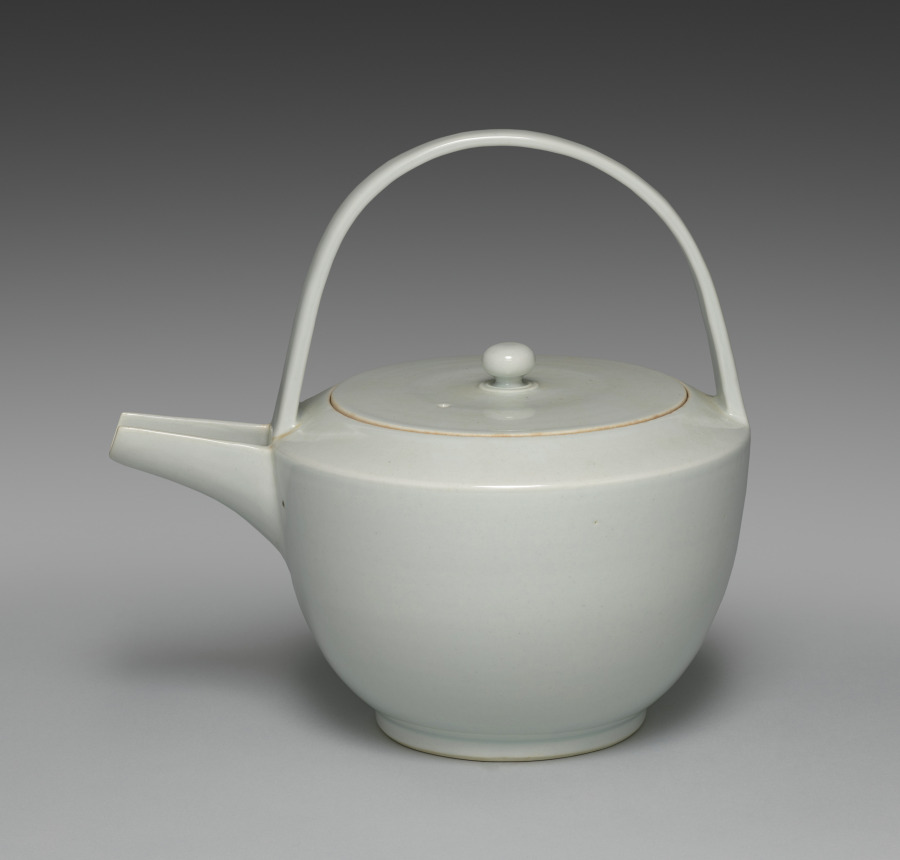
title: Sake Pourer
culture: Japan, Meiji period (1868–1912)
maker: Seifū Yohei III (Japanese, 1851–1914)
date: c. 1887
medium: Porcelain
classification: Ceramic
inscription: Artist's signature in underglaze blue on the base.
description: This sake pourer has a wide basin with a low foot; a generous spout open across the top half; a flat, round lid with a small knob recessed flush to the top of the container; and a tall, arched handle that meets the container where the top joins the basin at a sharp angle. This vessel is glazed but otherwise undecorated. Unlike the creamy white color of some Yohei III works, the white of this sake pourer has the bluish cast typical of porcelains produced in Kyoto.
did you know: Seifū Yohei III signed this sake pourer in underglaze blue on the base.